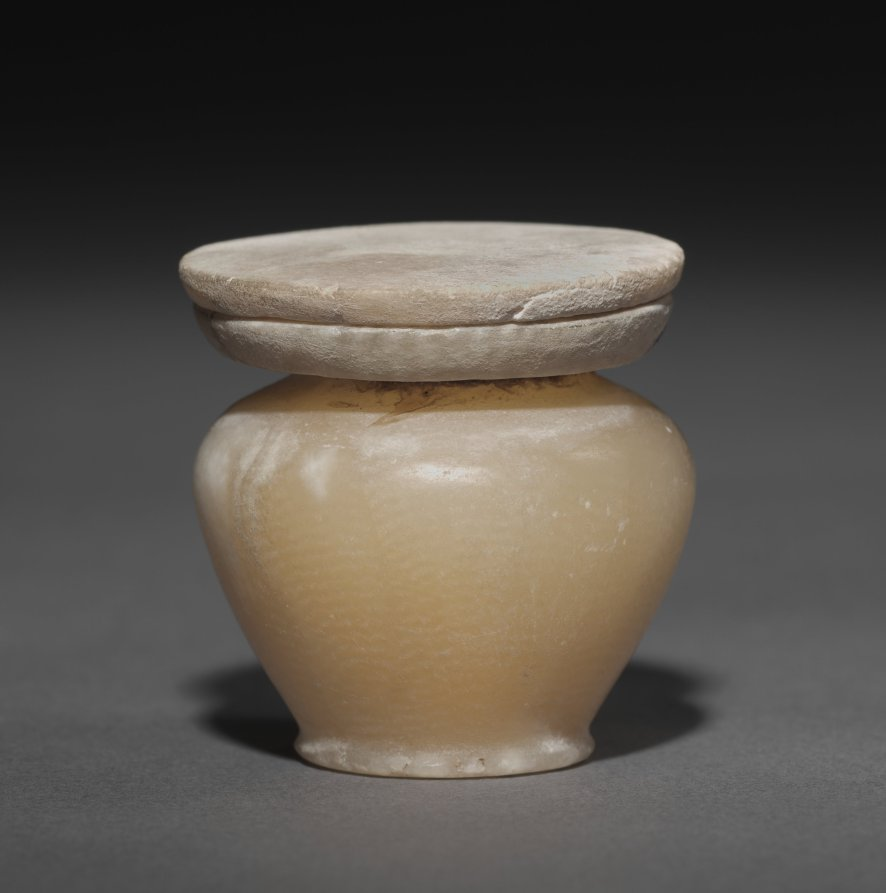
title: Kohl Jar with Lid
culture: Egypt, Middle Kingdom (2040–1648 BCE), Dynasty 12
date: 1980–1801 BCE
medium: travertine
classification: Vessels